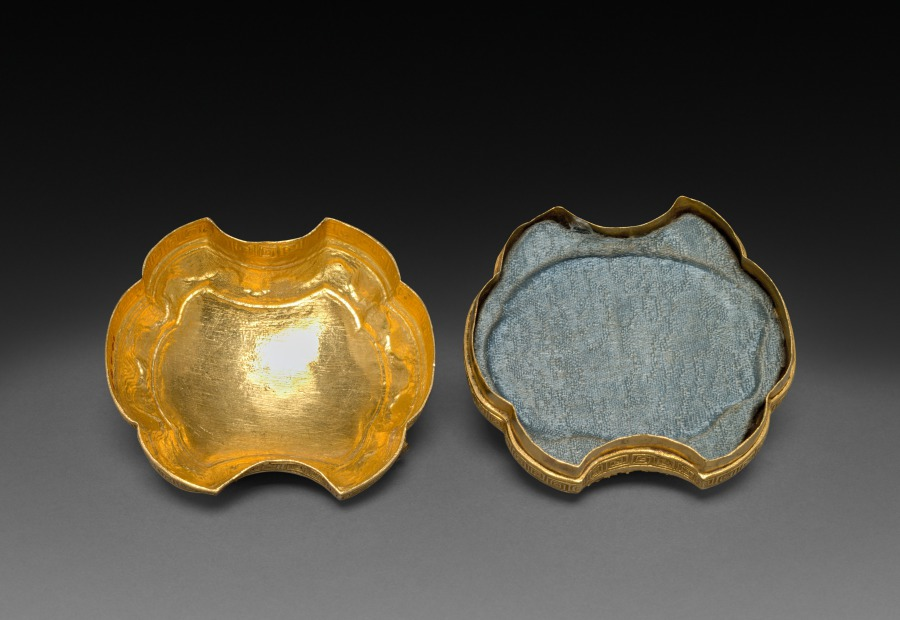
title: Box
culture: China, Qing dynasty (1644–1911)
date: 1800s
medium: silver gilt with kingfisher feather inlay and semi-precious stones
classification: Metalwork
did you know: The box is embellished with blue king-fisher feather inlays.